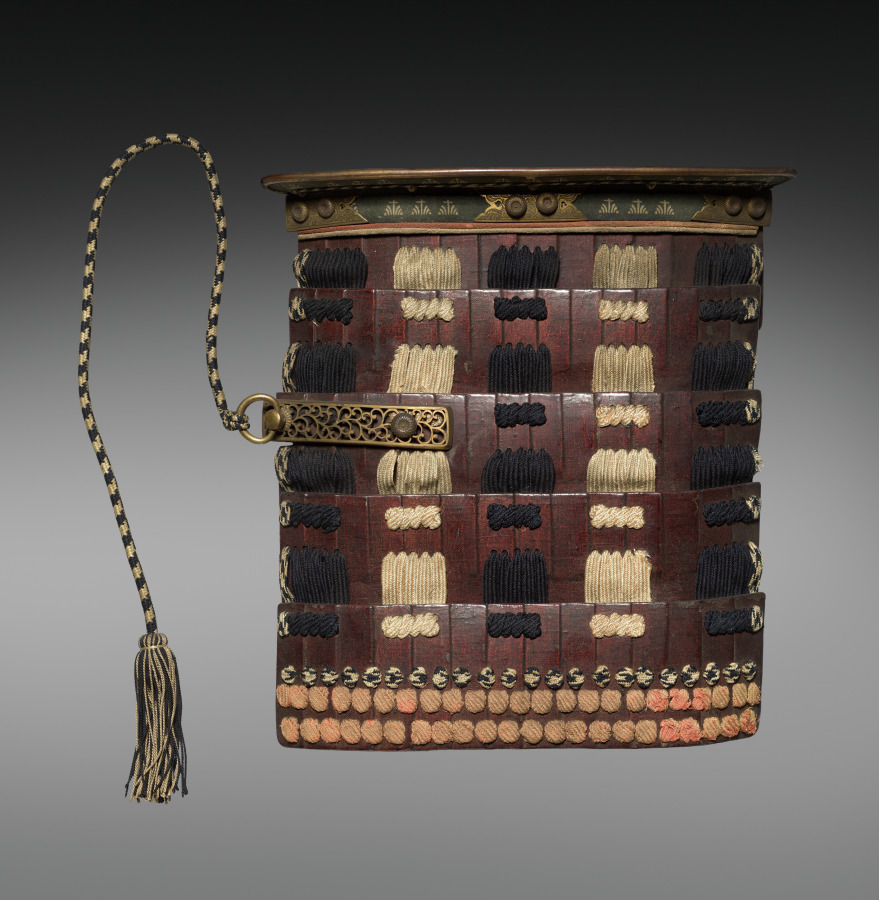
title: Shoulder Guard (Sode)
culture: Japan, Edo period (1615–1868)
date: 1600s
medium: Iron, lacquer, textile (silk)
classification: Arms and Armor